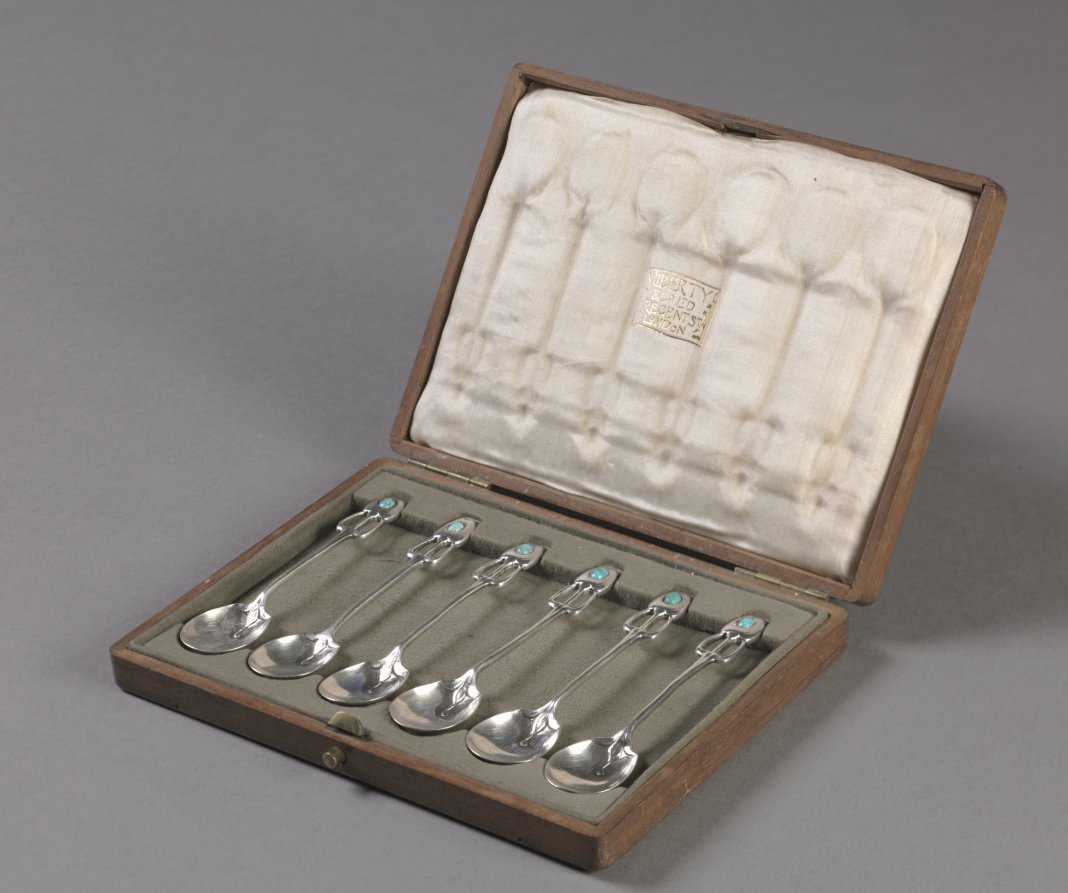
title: Set of six Spoons in Original Box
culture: England, London, 19th century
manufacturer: Liberty and Company (British)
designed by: attributed to Archibald Knox (British, 1864–1933)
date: c. 1895–1910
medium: Silver, enamel decoration and leather box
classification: Silver